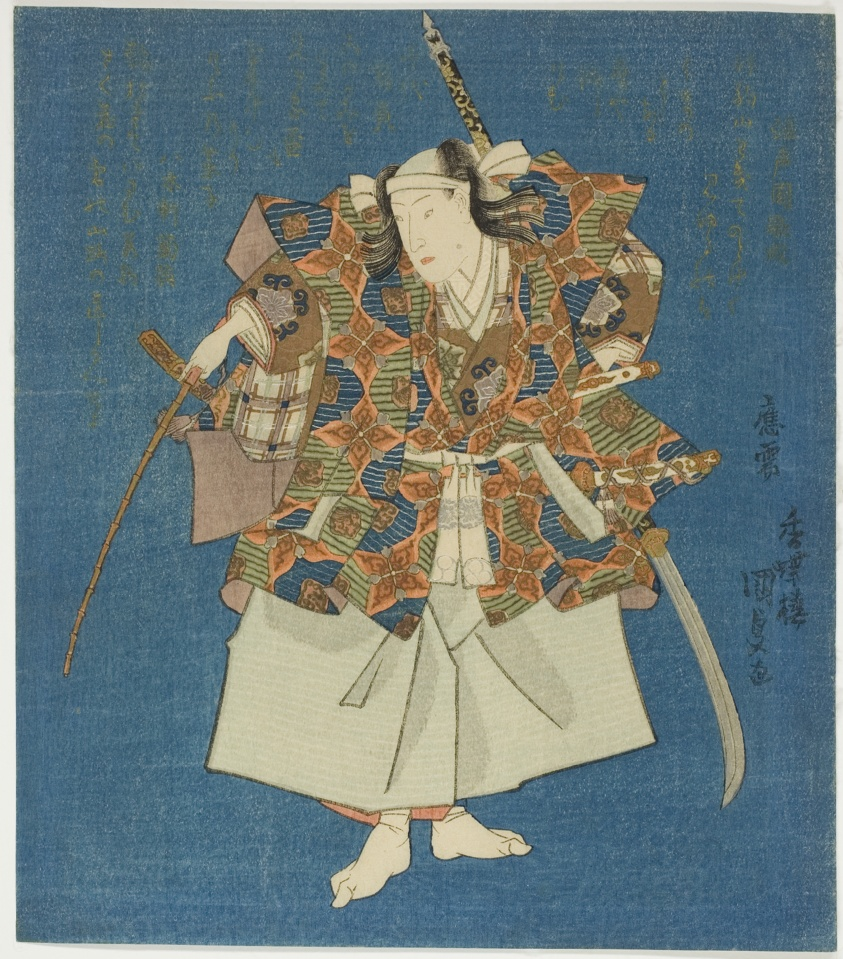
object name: Print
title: Actor in riding garb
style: Japanese (culture or style)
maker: Utagawa Kunisada I (Toyokuni III) (Japanese, 1786-1864)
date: 1834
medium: Color woodblock print; shikishiban, surimono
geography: Japan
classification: woodblock print; print; asian art